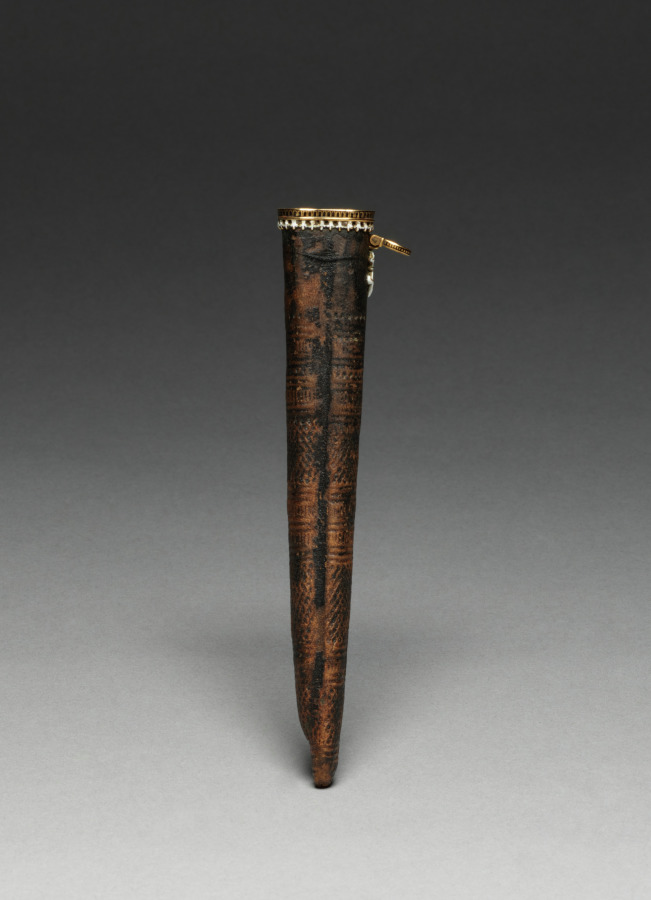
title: Knife and Fork with Sheath (Sheath)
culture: Italy, Venice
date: late 1500s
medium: gold, enamel, crystal, steel, leather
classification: Enamel